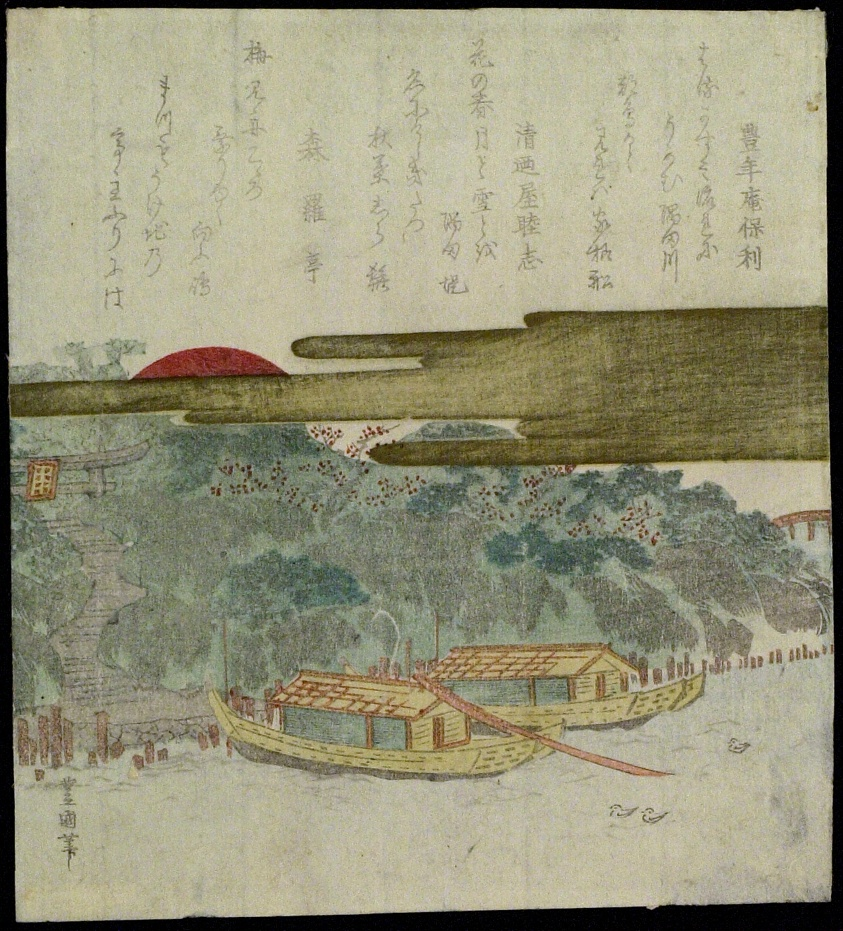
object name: Print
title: Shirahige Shrine at Dawn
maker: Utagawa Toyoshige (Toyokuni II) (Japanese, 1777–1835)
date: early 19th century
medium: Color woodblock print; surimono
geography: Japan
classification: woodblock print; print; asian art